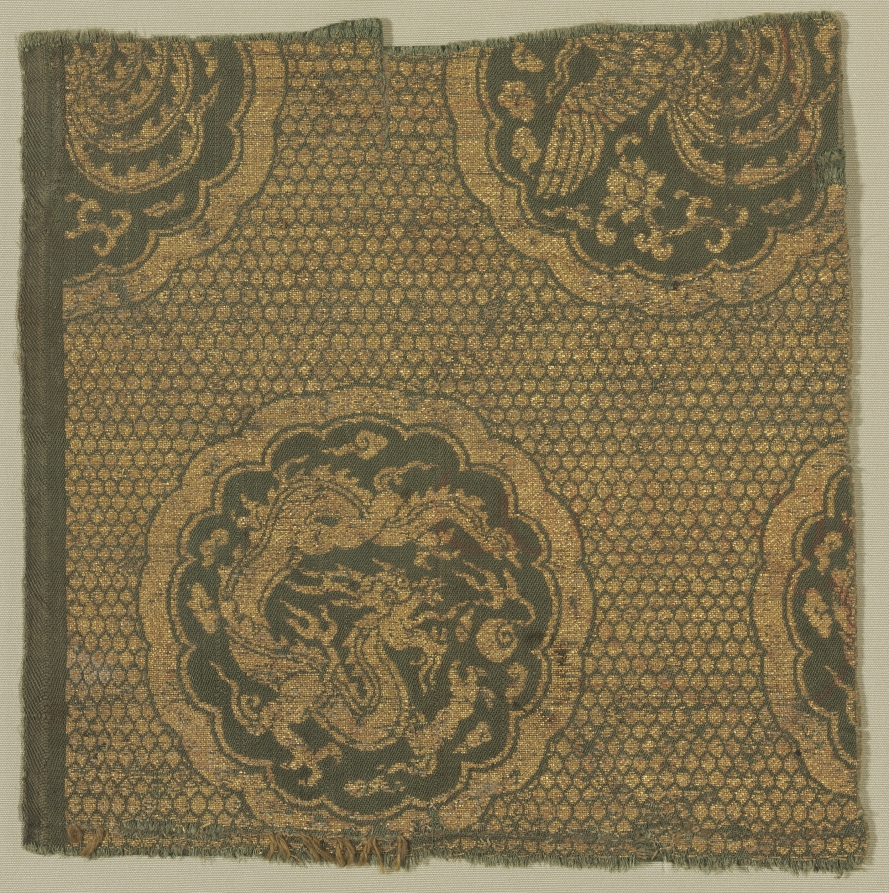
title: Textile with Phoenixes and Dragons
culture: China, Yuan dynasty (1260-1368)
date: 1279–1368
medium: Silk and gold thread; lampas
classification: Textile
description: This is one of the very few northern Chinese silk and gold textiles to have survived from the Yuan dynasty. The curled dragons chasing pearls, the phoenixes, and the background of tiny hexagons are Chinese motifs, but the lobed roundels enclosing the dragons and phoenixes indicate the influence of eastern Iranian craftsmen who had been relocated to northern China. A red and gold silk woven with the same pattern is preserved in Beijing. The extraordinary survival of the two silks demonstrates that patterns were typically used over and over.